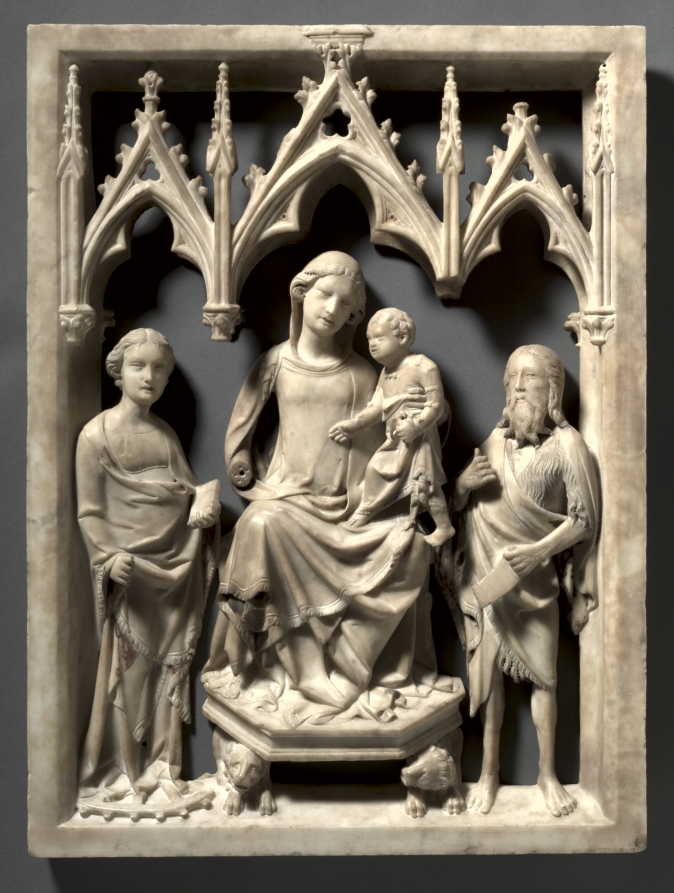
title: Madonna and Child with Saints Catherine and John the Baptist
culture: Italy, Siena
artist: Giovanni di Agostino (Italian, c. 1310–1370)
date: c. 1340–50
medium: marble with traces of polychromy and gilding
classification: Sculpture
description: The Madonna is seated beneath a Gothic-arched canopy flanked by Saints Catherine and John the Baptist. A rectangular frame encloses the group. Most likely from a Sienese church interior, the work is probably a fragment of a larger sculptural program such as a tomb. An authentic Gothic style in sculpture appeared in Tuscany from the mid 1200s through about 1350 elucidated by the work of Giovanni di Agostino, Nicola and Giovanni Pisano, and others who were active on Siena Cathedral’s sculptural program. Agostino’s work suggests an awareness of Gothic sculpture and the decorative arts in France from which he borrowed freely. This relief was probably completed just before the plague of 1348, an event which altered the degree and character of Sienese art.